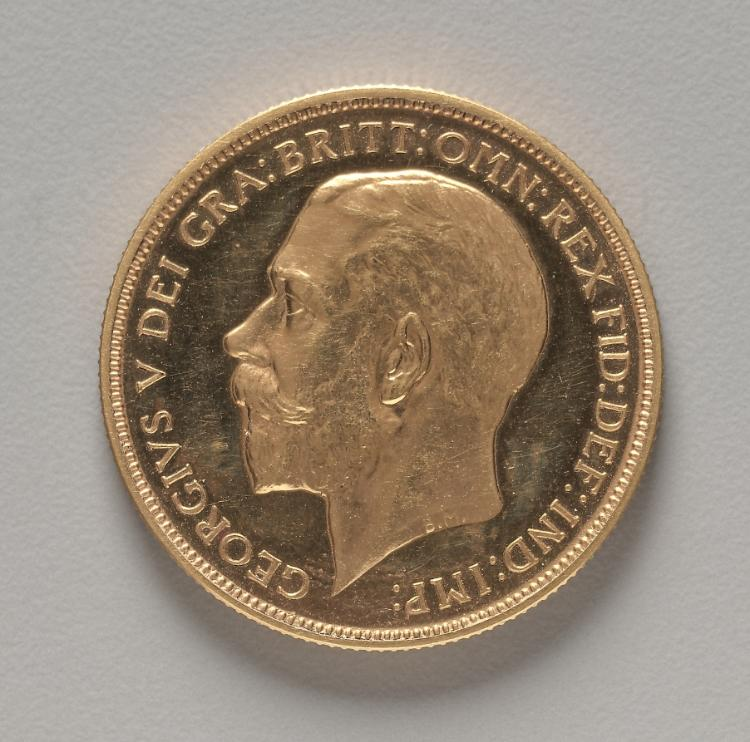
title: Two Pound Piece: Portrait of King George V (obverse)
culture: England, George V, 1910-1936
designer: Bertram Mackennal (Australian, 1863–1931)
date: 1911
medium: gold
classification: Coins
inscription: GEORGIVS V DEI GRA: BRITT: OMN: REX FID: DEF: IND: IMP: